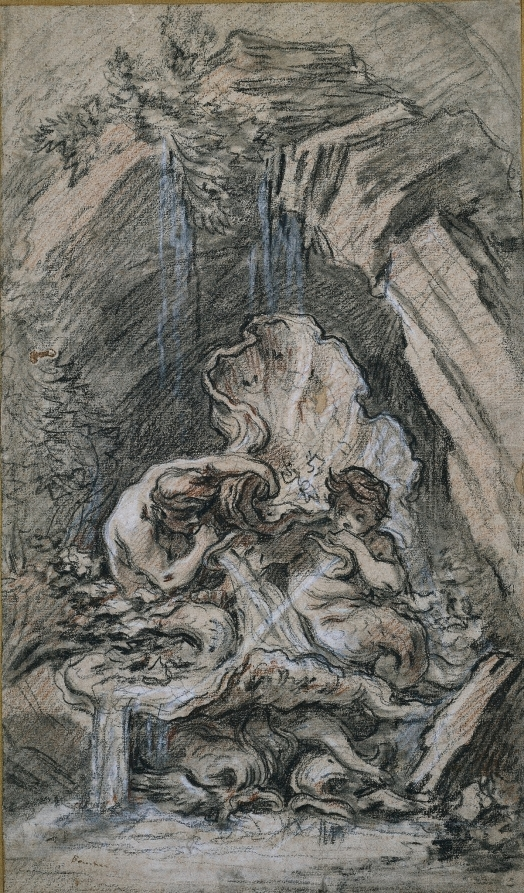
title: Fountain with Two Tritons Blowing Conch Shells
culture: France, 18th century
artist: François Boucher (French, 1703–1770)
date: c. 1736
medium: Black chalk with stumping, and red chalk, heightened with white chalk on beige laid paper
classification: Drawing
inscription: lower left, in brown ink: Boucher; secondary support, in graphite: [195?]; verso of secondary support, upper center, in brown ink: M / No. 53; center, in graphite: B / [illegible]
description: In this early chalk drawing, François Boucher combined plants, dolphins, rocks, shells, and tritons (mythological creatures that are part man and part fish) into a design that was meant to suggest a fountain in a rocky garden grotto. This sheet represents l'art rocaille, or "rock and shell art," a style of ornament that developed in France during the 1730s and featured decorative compositions with abundant detail. The image was one of seven that the printmaker Gabriel Huquier translated as etchings around the time Boucher completed them. These reproductions helped to bring Boucher's work to a broader audience, including other artists who emulated his style.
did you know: While translating this drawing into etching, the printmaker Gabriel Huquier replaced Boucher's grotto setting with an architectural niche.